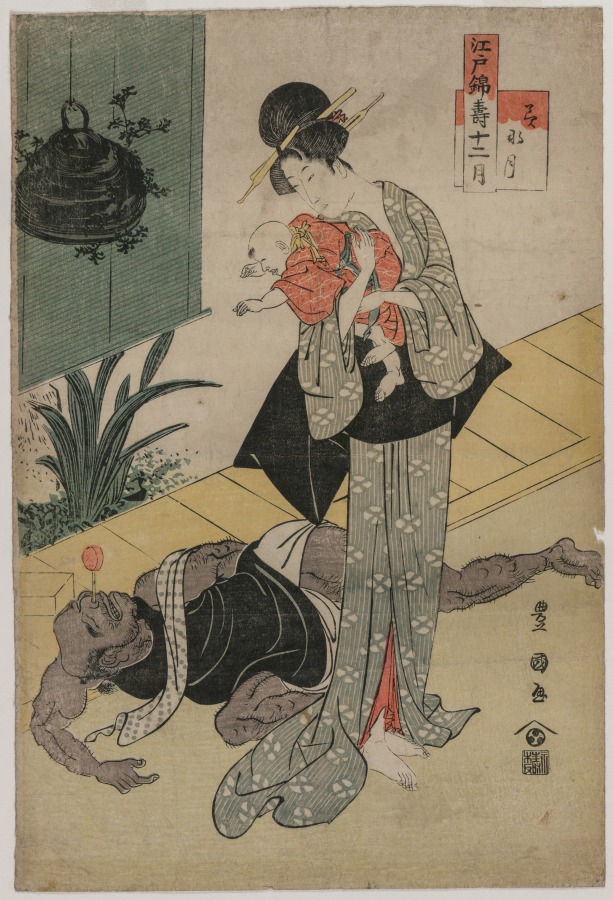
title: The Sixth Month (from the series The Twelve Felicitous Months in Edo Brocades)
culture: Japan, Edo period (1615–1868)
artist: Utagawa Toyokuni (Japanese, 1769–1825)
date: c. late 1790s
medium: color woodblock print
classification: Print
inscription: Signature: Toyokuni ga Publisher: Nishimuraya Yohachi (Eiju han, emblem)